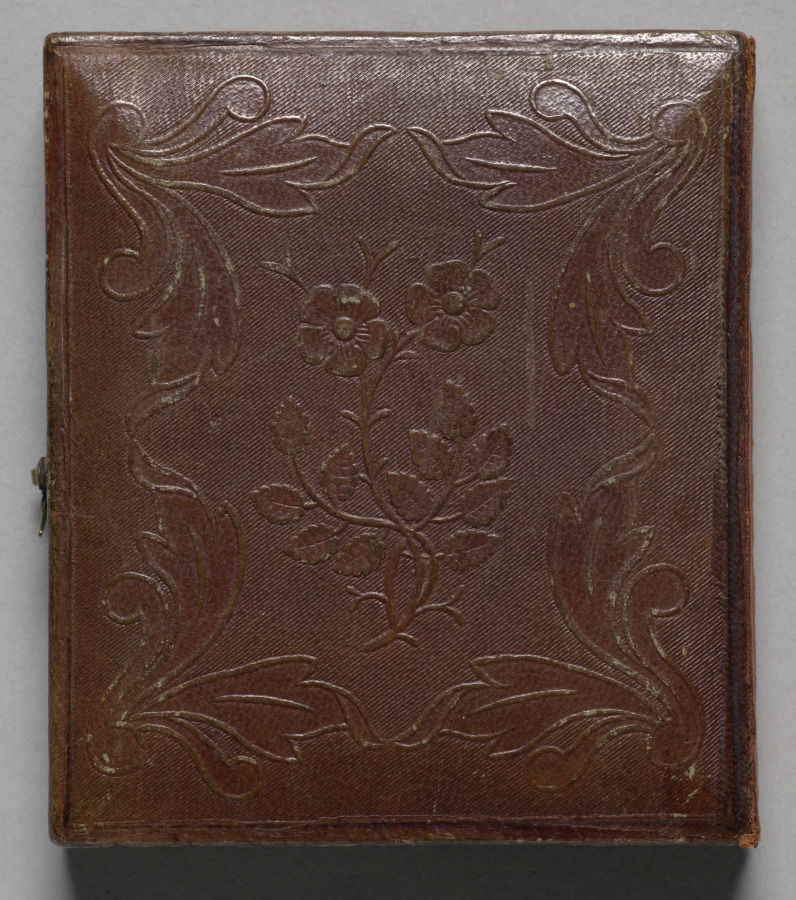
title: Architect with his drawings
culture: America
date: c. 1850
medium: daguerreotype, sixth plate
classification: Photograph